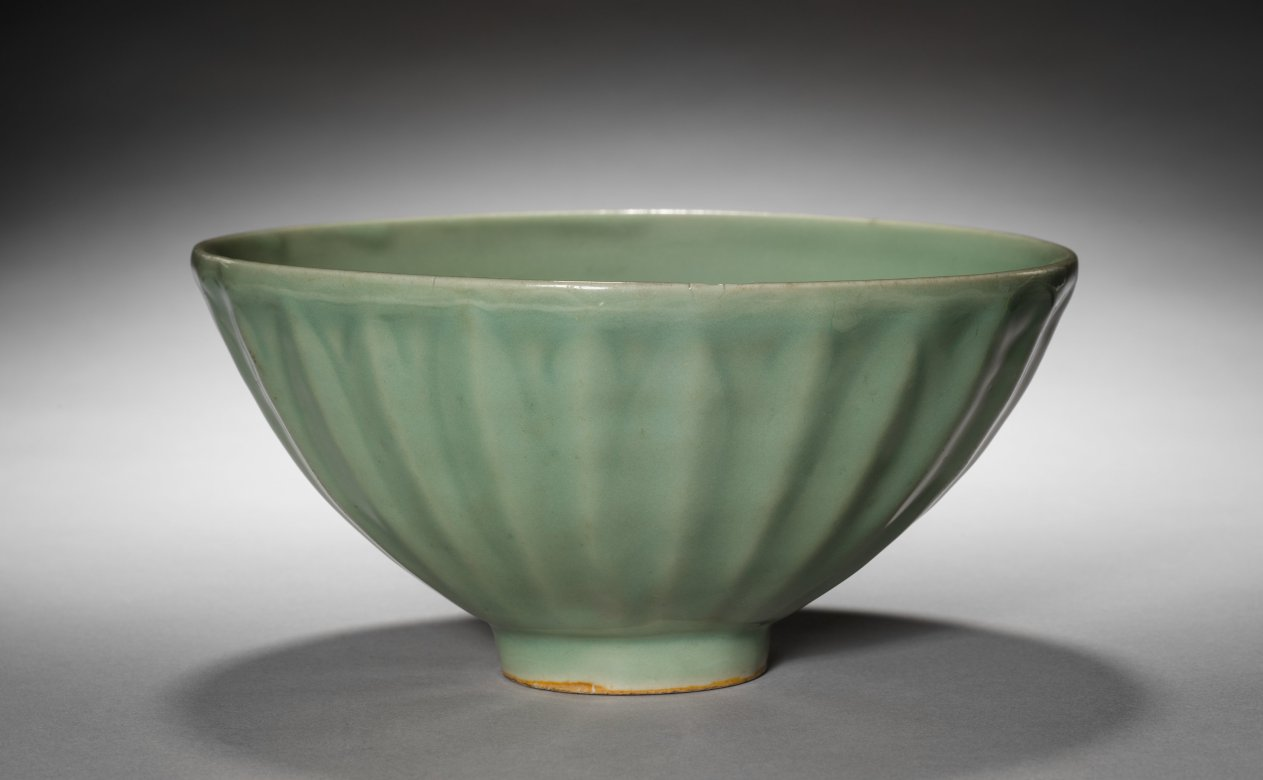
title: Lotus Bowl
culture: China, Zhejiang province, Longquan region, Southern Song dynasty (1127-1279)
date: 1200s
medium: green-glazed porcelaneous stoneware, Longquan ware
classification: Ceramic